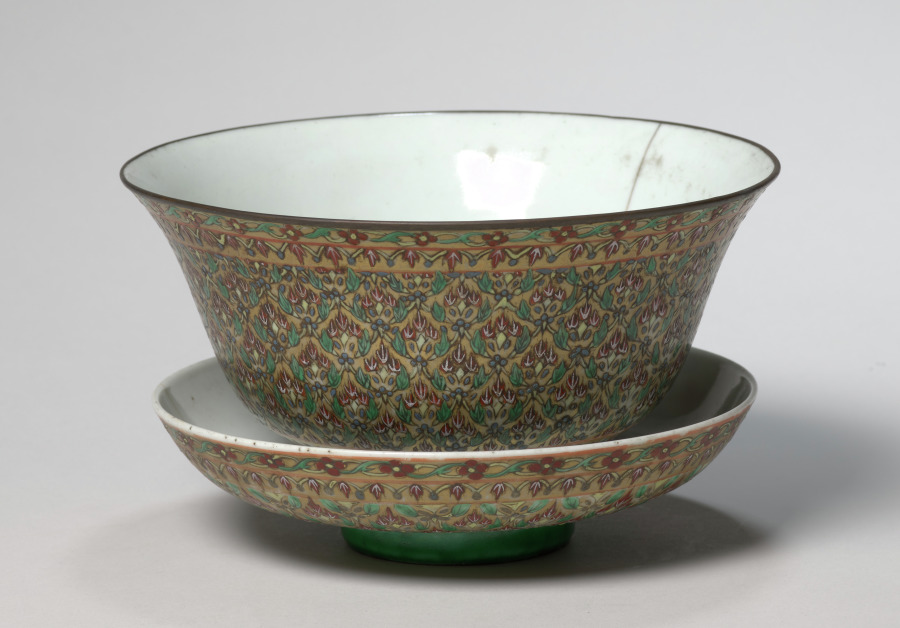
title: Chow Bowl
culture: Siam, 18th century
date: 1700s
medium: porcelain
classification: Metalwork